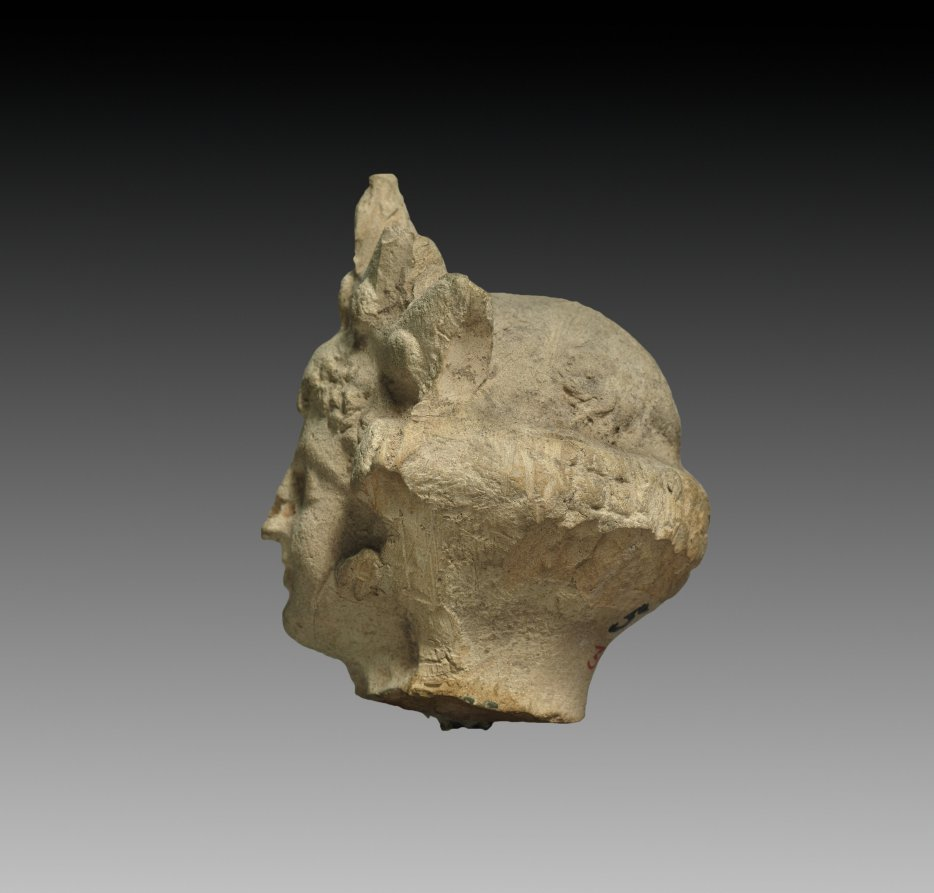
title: Head of a Goddess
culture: Parthian Empire (247 BCE–224 CE)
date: 1–200 CE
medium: terracotta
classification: Sculpture